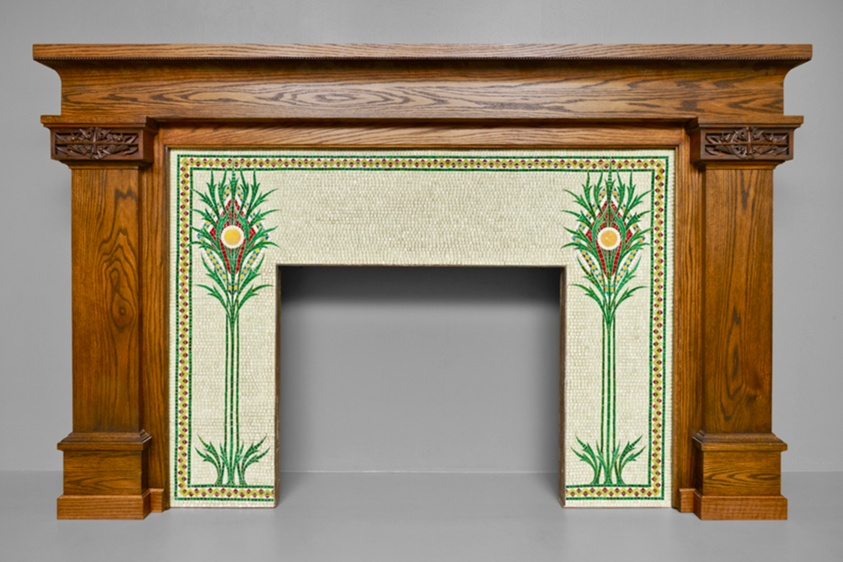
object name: Decorative Arts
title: Fireplace Surround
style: Arts and Crafts Movement, American Arts and Crafts Movement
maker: Designed by George Washington Maher; American, 1864–1926; Made by Louis J. Millet; American, 1855–1923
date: 1901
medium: Oak and glazed earthenware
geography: United States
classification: mantel (fireplace component); american decorative arts; decorative arts; furniture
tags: architecture